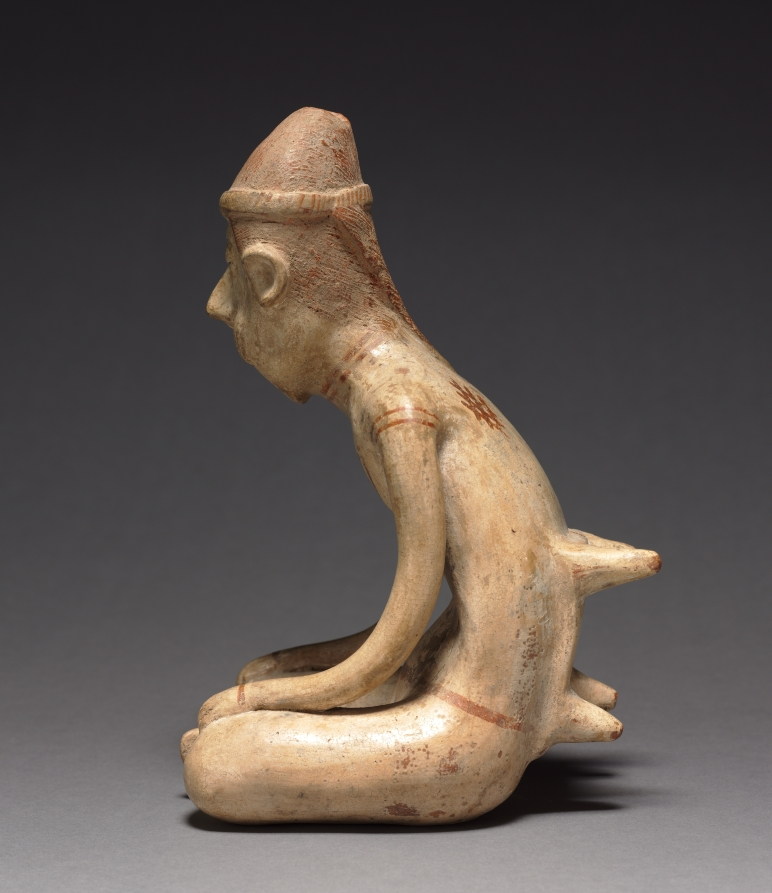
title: Seated Male Figure with Backrest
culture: Mexico, Nayarit, Chinesco style, Type E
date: 100 BCE–300 CE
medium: pottery with burnished cream and red slips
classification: Sculpture